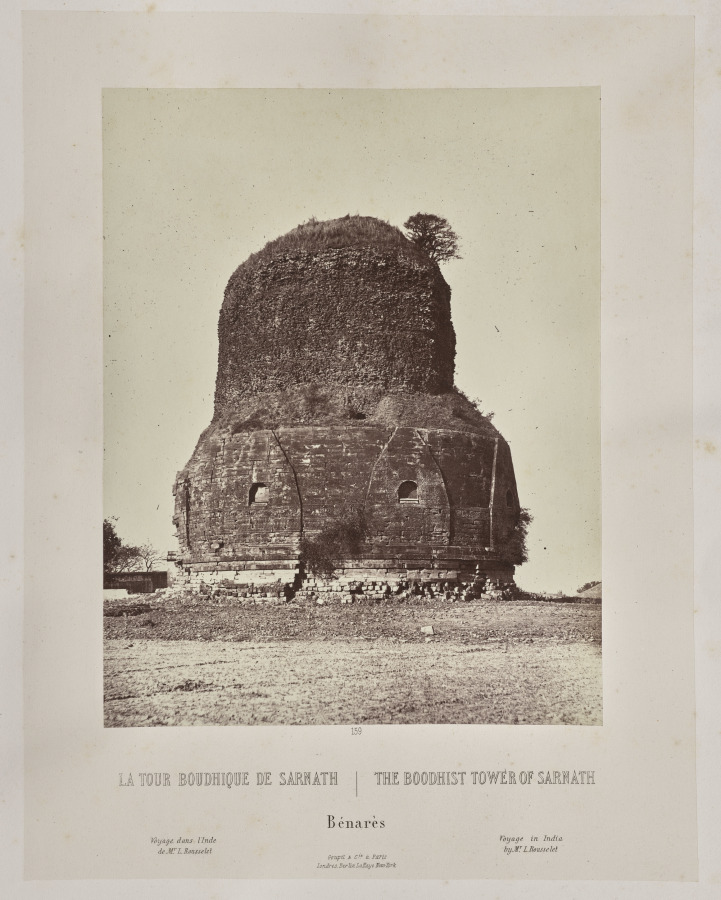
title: The Boodhist Tower of Sarnath, Bénarès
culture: France, 19th century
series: India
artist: Louis-Théophile Marie Rousselet (French, 1845–1929)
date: 1865–68, published 1869–70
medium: Albumen print from glass plate negative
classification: Photograph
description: Concerned that his drawings did not do justice to the splendor of India’s monuments, Rousselet learned photography in India that year, a remarkable accomplishment. He proved to be a talented photographer with a sophisticated sense of composition. The scenes in this volume sweep across sites of Sultanate, Rajput, and Mughal power in northern India, from the sacred Hindu city of Varanasi on the Ganges River to Alwar in Rajasthan. Also included are several scenes of industry and portraits of Indian rulers.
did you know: Louis Rousselet described himself as a “scientific traveler” when he went to India alone at age 18 in 1863 and stayed into 1868.